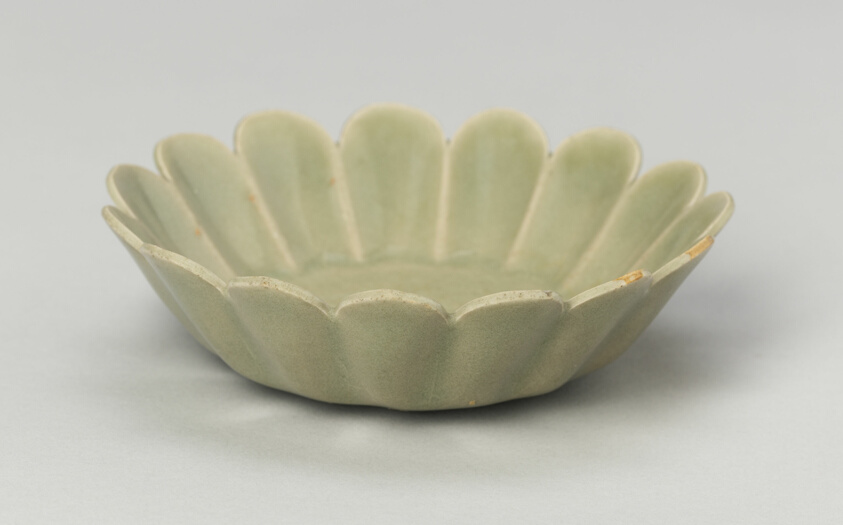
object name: Vessel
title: Scalloped-Rimmed Dish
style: Chinese (culture or style)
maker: China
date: Southern Song dynasty (1127–1279)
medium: Yaozhou ware; glazed stoneware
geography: China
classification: dish (vessel); ceramics; vessel